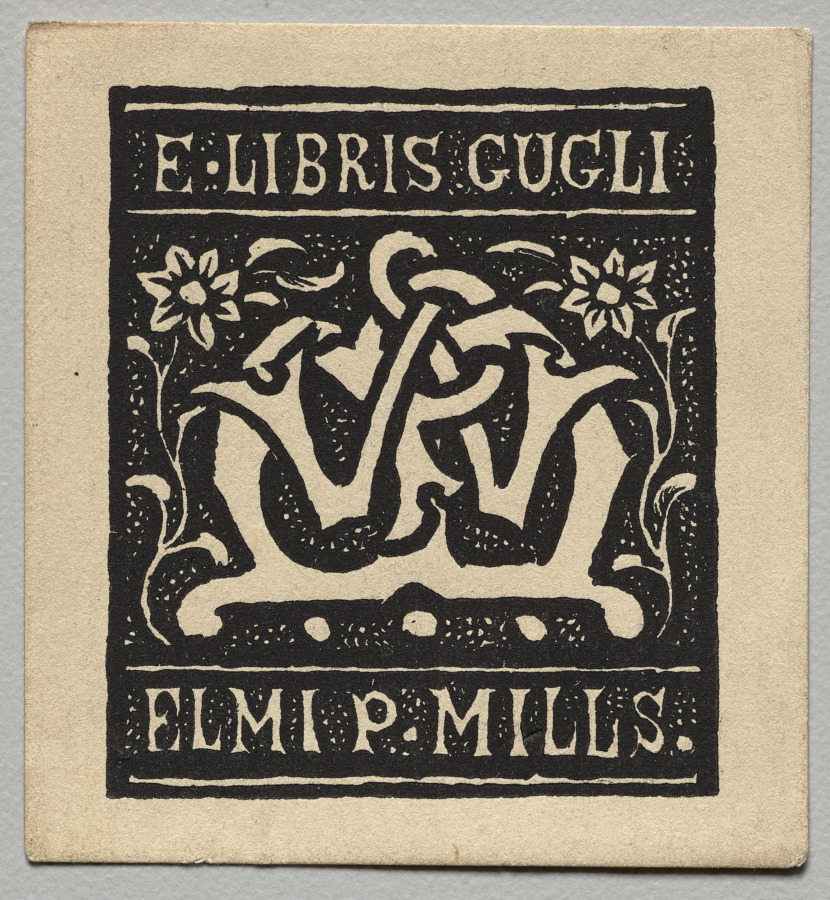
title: Bookplate: Elmi P. Mills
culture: England, 19th century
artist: Charles Samuel Keene (British, 1823–1891)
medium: print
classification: Print